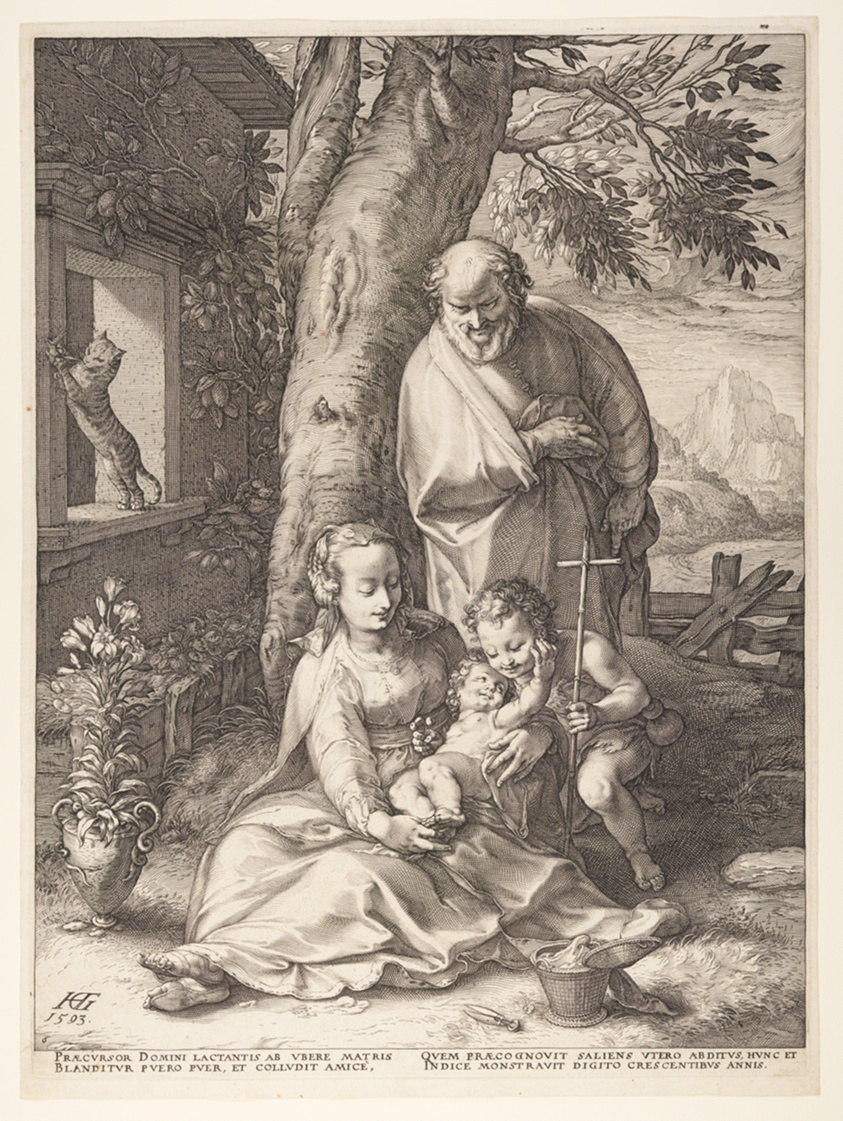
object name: Print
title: The Holy Family with the Infant John the Baptist, from The Birth and Early Life of Christ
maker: Hendrick Goltzius (Dutch, 1558–1617)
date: 1593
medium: Engraving on ivory laid paper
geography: Netherlands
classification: engraving; paper; print; prints and drawing